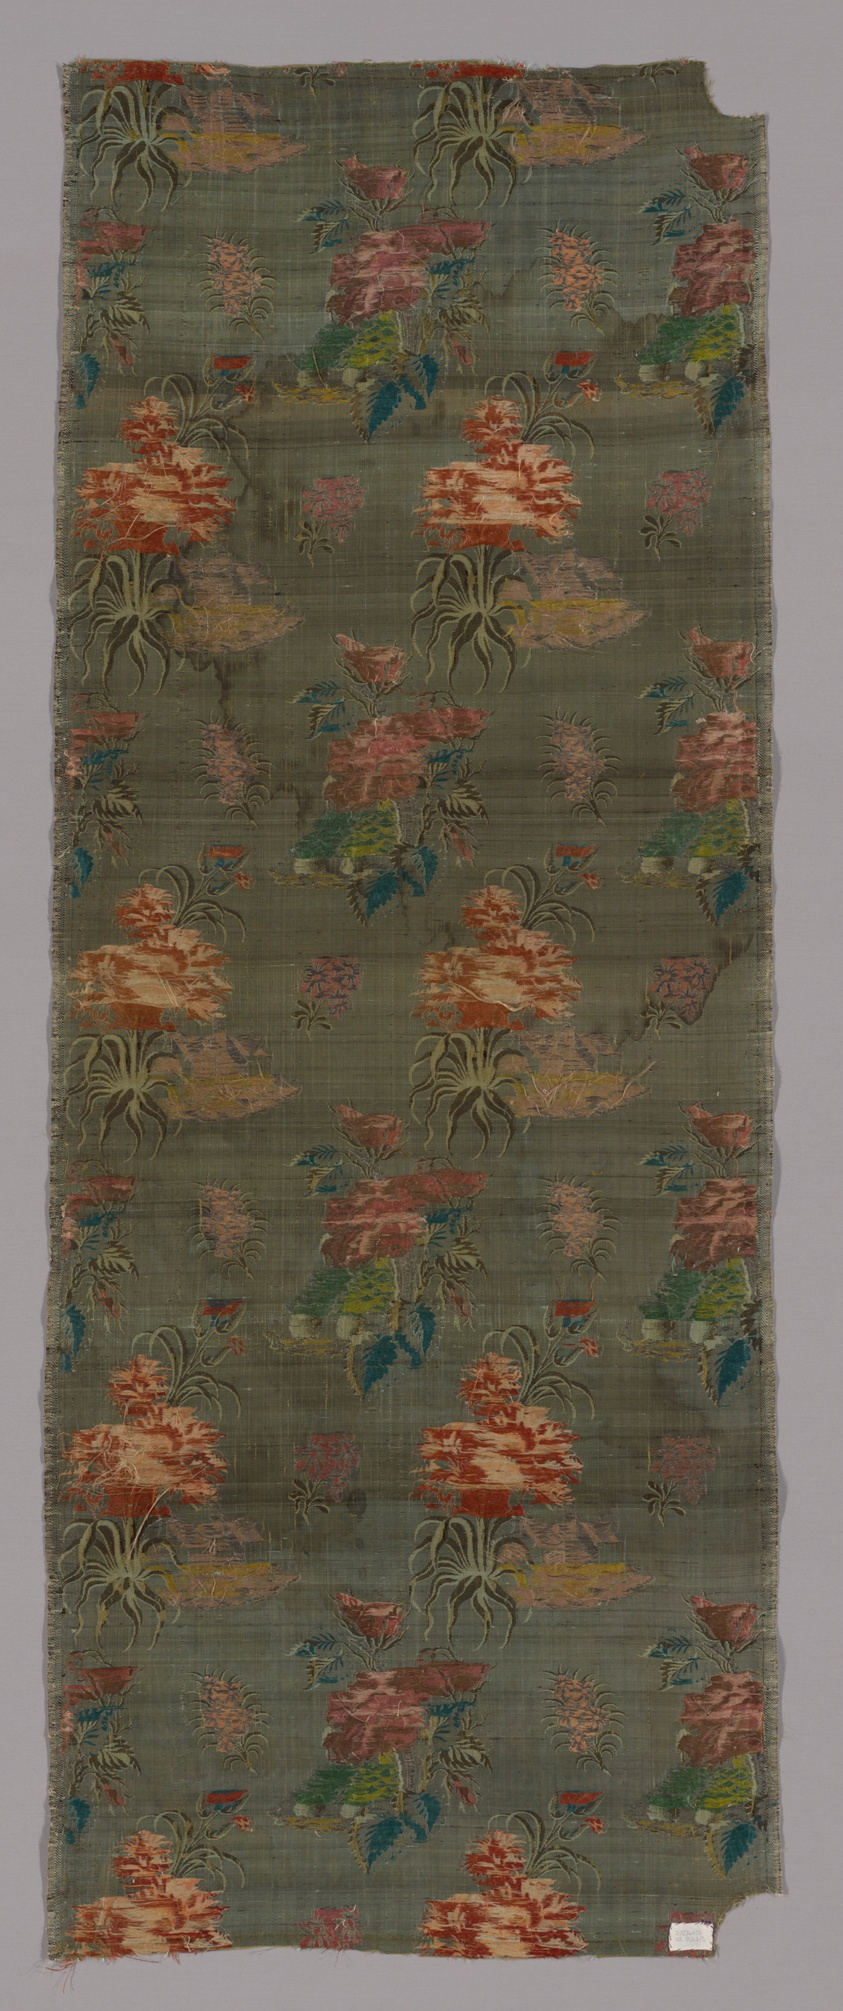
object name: Textile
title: Panel (Dress Fabric)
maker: France, probably Lyon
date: 1701/25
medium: Silk, satin; brocaded in silk and metal thread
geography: France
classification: textile; weaving